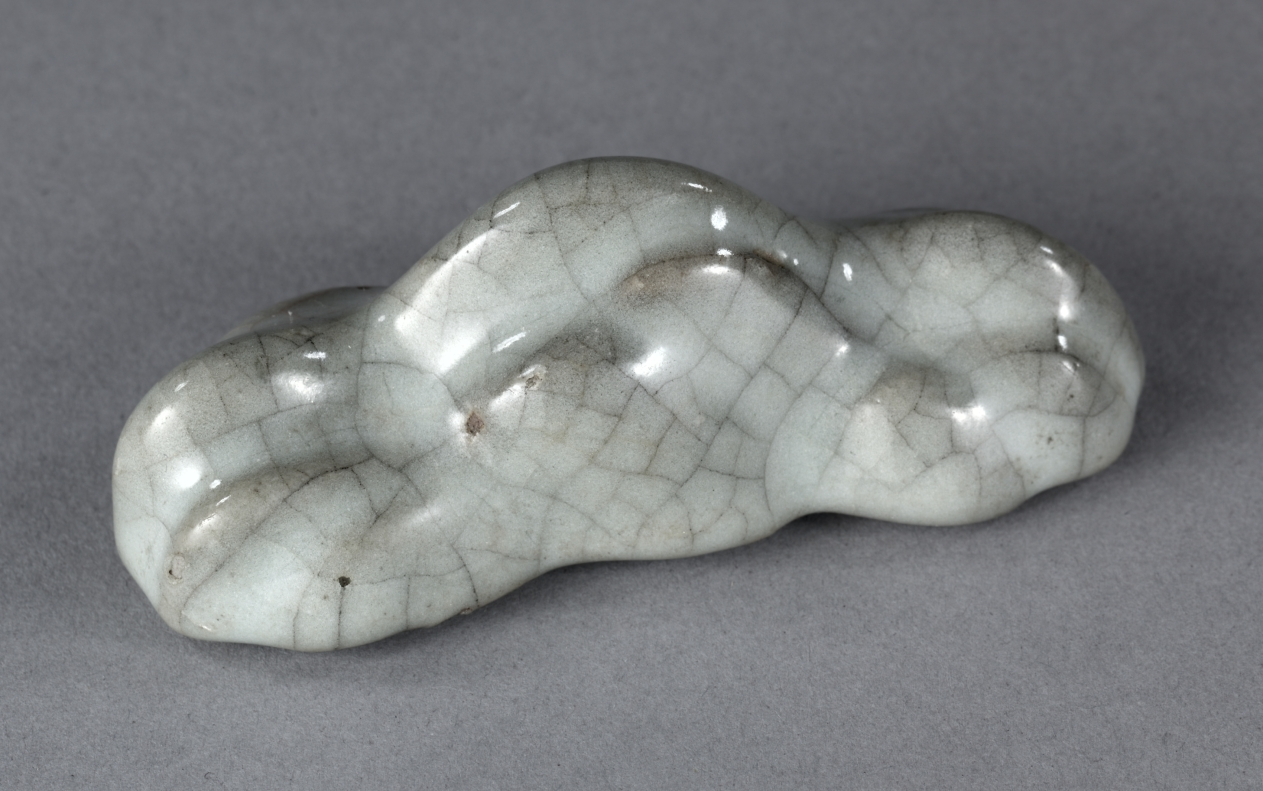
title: Brush Rest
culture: Southeast China, Zhejiang province, Southern Song dynasty (1127–1279)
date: 1127–1279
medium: glazed stoneware, Guan ware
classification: Ceramic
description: This brush rest, shaped like a mountain range, is covered with a thick and soft gray-blue crackled Guan ware glaze that pools in the deeper areas, giving the mountain range a hazy appearance as if enshrouded in white mists. Guan ware was produced in the imperial kilns in Hangzhou, the Southern Song dynasty capital.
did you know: There are twelve "hills" on this mountain-shaped brush rest.